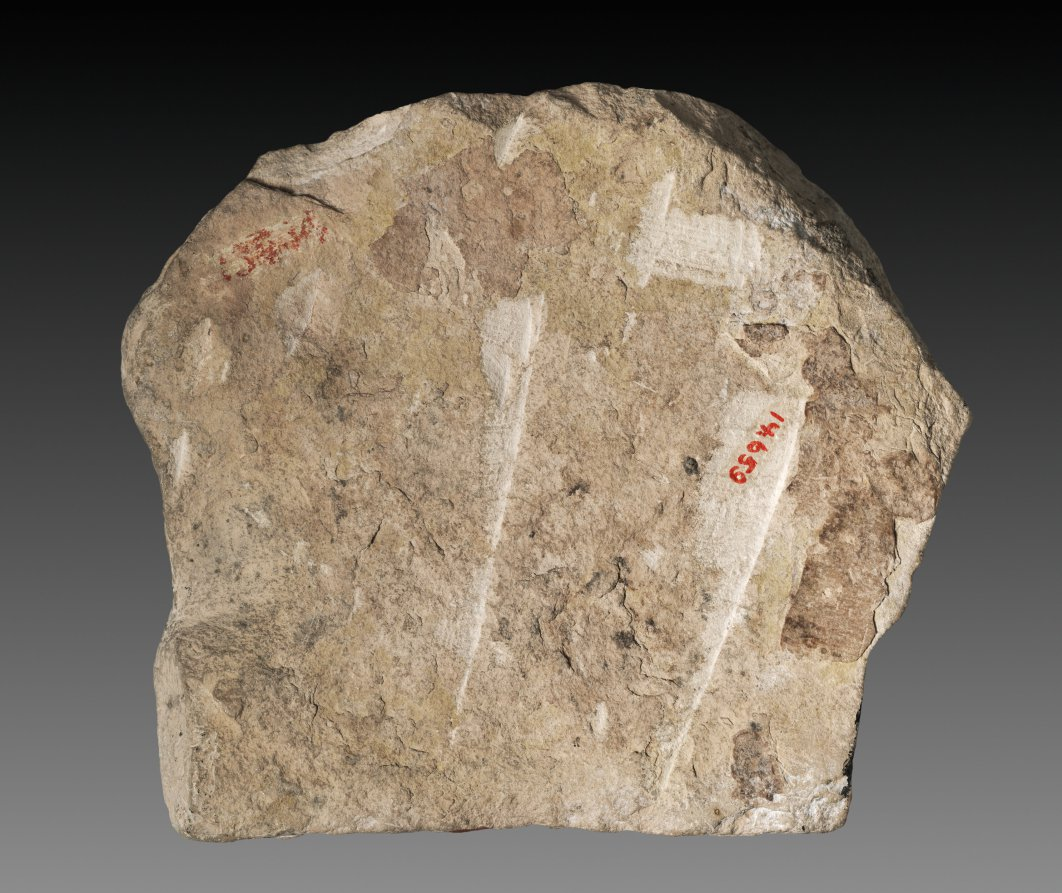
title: Fragment of Relief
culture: Egypt, Modern forgery (?)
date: INVALID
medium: limestone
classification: Sculpture